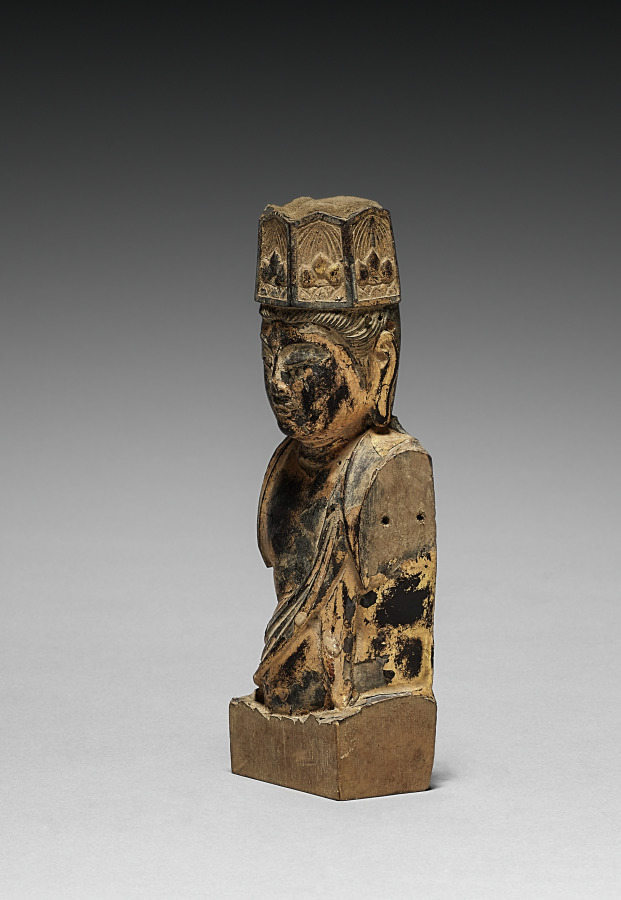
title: Bodhisattva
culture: Japan, Heian period (794–1185)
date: 900s-1100s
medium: gilded wood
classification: Sculpture